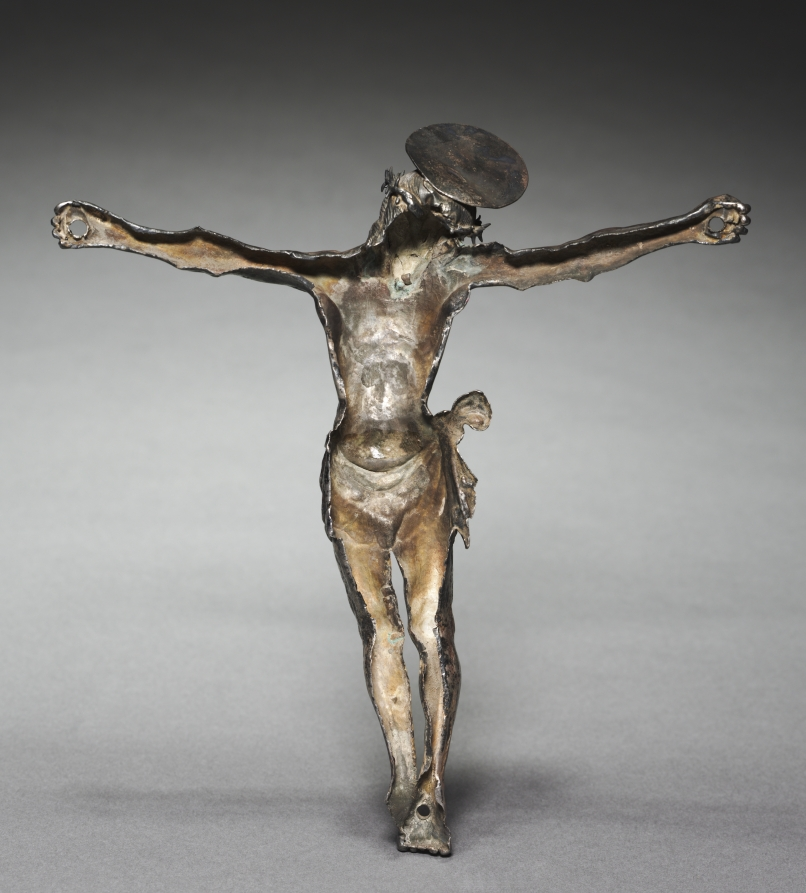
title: Crucifix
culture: Spain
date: 1500s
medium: silver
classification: Sculpture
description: Despite being identified as Spanish since entering the museum's collection, the origin of this crucifix is not so clear. The face and beard could bring to mind Spanish silverwork, but those same features may also suggest that the crucifix is of German design. The back of the figure raises its own set of questions, due to the fact that it has been left hollow and open.